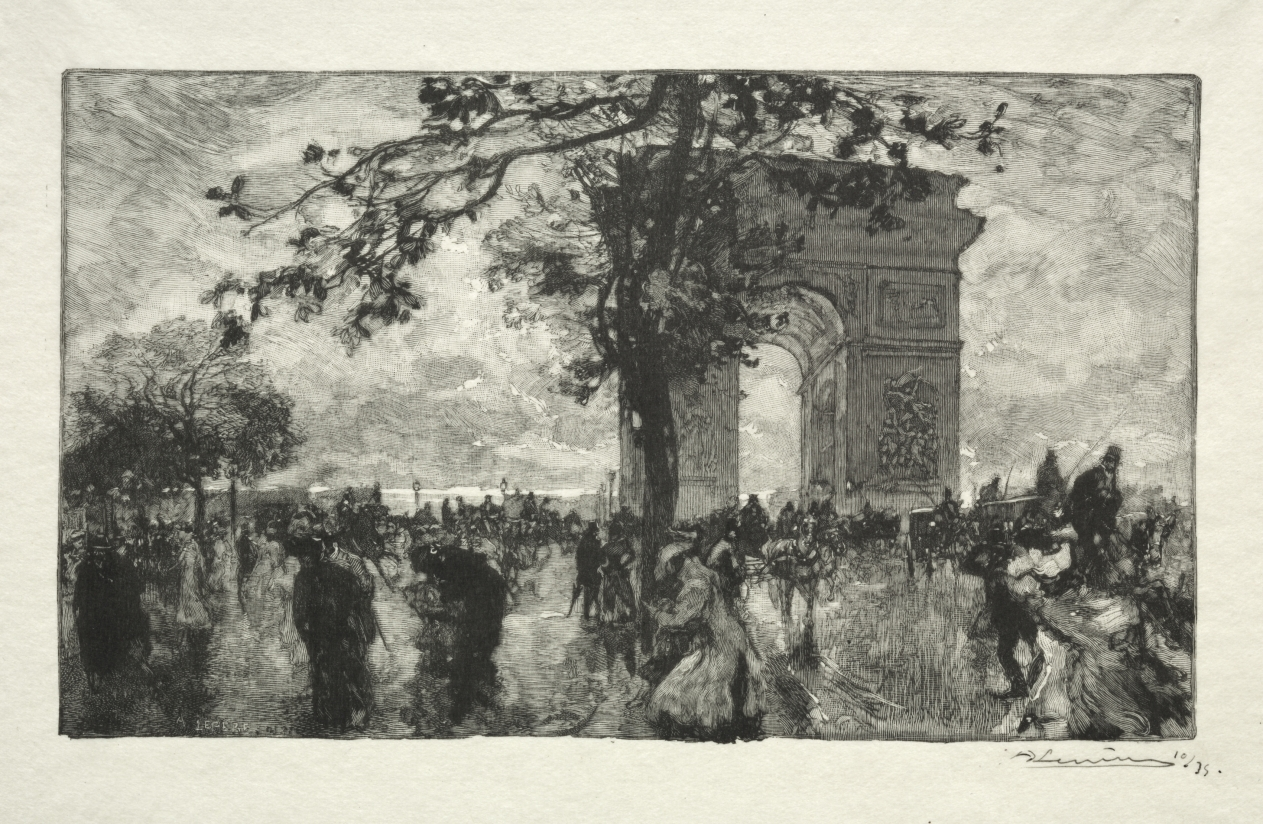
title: Retour du Bois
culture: France, 19th-20th century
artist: Auguste Louis Lepère (French, 1849–1918)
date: 1890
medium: wood engraving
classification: Print